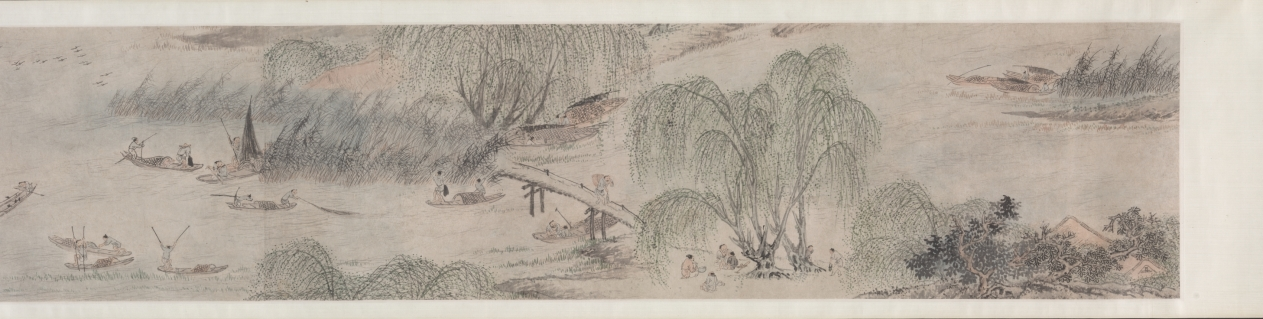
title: Fisherman's Joy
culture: China, Ming dynasty (1368–1644)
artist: Qian Gu (Chinese, 1508–c. 1578)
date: 1572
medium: Handscroll; ink and light color on paper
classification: Painting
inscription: Artist's inscription, signature, and seal: On the autumn day of the jen-shen year [1572], P'eng-ch'eng, Ch'ien Ku painted [this]. [seal] Hsüan-ch'ing shih. 2 colophons, both dated 1689, and 5 additional seals of Yün Shou-p'ing (1633-1690).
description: This painting has a scene showing two small crafts, each manned by two fishermen, practicing a traditional fishing method. In one of them, a man uses a bamboo pole to direct the movements of a cormorant bird sent into the water. Cormorant fishing, witnessed in some areas of the lower Yangzi River, appears in Zhe school paintings. Qian Gu may have borrowed these narrative figure scenes from Zhe school paintings, while his vantage point, brushwork, and soft tones align with the Wu school style. Scenes of fishermen appealed to urban and educated audiences who idealized the self-sufficient independence of fisherfolk.